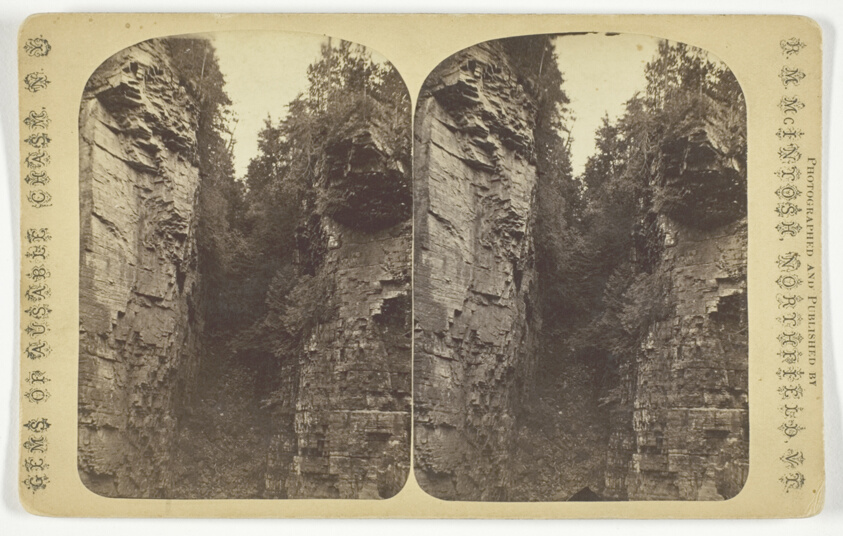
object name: Photograph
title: Shady Gorge, No. 1071 from the series "Gems of Ausable Chasm, N. Y."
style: 19th century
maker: R. M. McIntosh; American, active late 19th century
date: Late 19th century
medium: Albumen print, stereo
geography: Vermont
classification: photography; photograph; albumen silver print; stereograph (albumen)